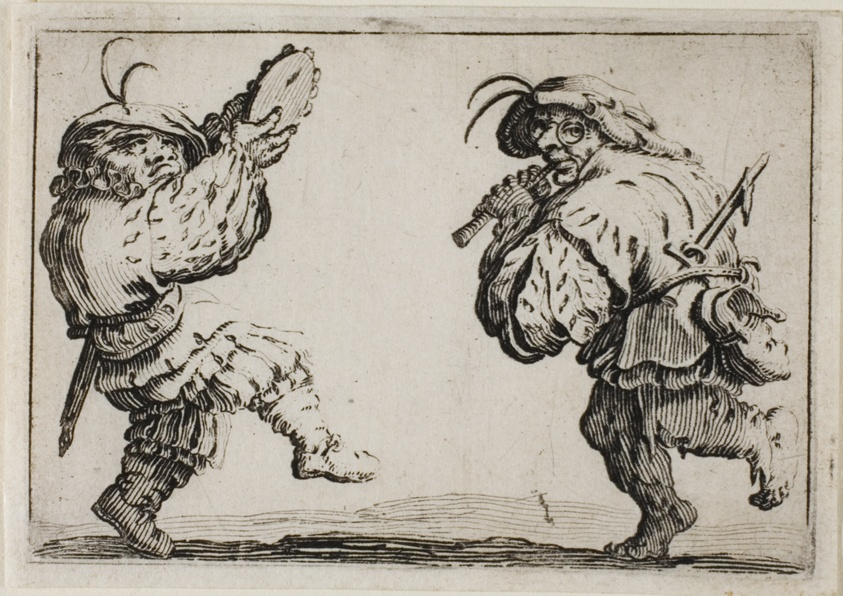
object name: Print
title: The Dancers with a Flute and a Tamborine, from The Caprices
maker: Jacques Callot (French, 1592-1635)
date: c. 1622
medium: Etching in black on ivory laid paper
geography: France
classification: etching; print; prints and drawing